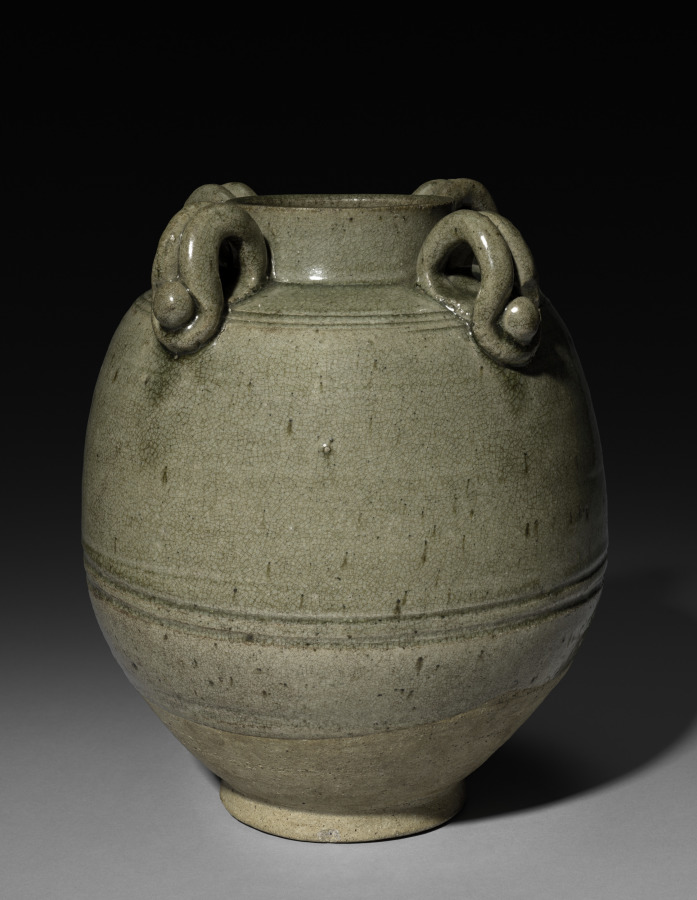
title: Jar with Four Loop-Handles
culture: China, Sui dynasty (581-618) - Tang dynasty (618-907)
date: 500s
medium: glazed gray stoneware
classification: Ceramic